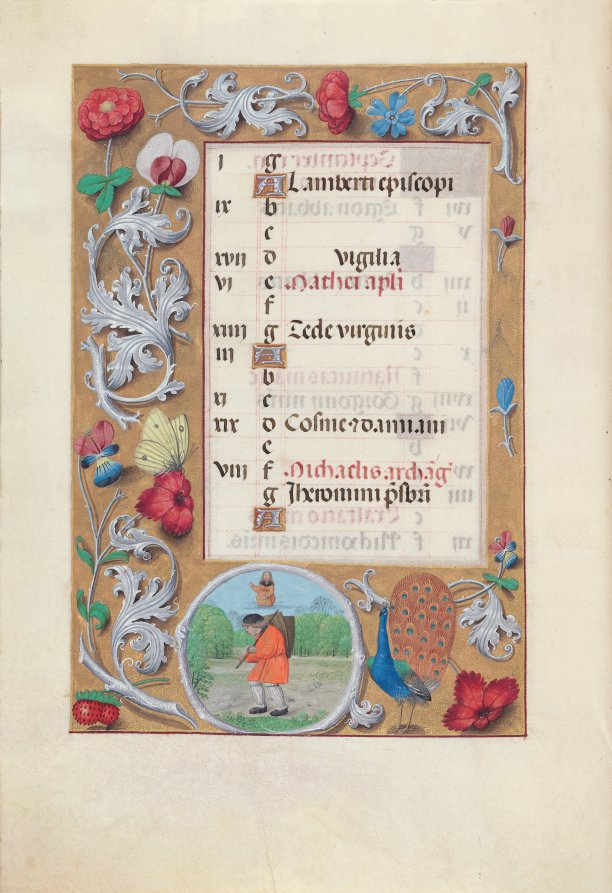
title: Hours of Queen Isabella the Catholic, Queen of Spain: Fol. 10v, September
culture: Flanders, Ghent and Bruges, late 15th century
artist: Master of the First Prayerbook of Maximillian (Flemish, c. 1444–1519)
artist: and Associates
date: c. 1500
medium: ink, tempera, and gold on vellum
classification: Bound Volume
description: This manuscript was illuminated by a circle of at least five highly organized manuscript painters active in the Flemish cities of Ghent and Bruges. The principal illuminator was Alexander Bening, who painted the majority of the book's miniatures. Manuscripts produced by this circle of artists are renowned for the decoration of their borders, which typically feature a rich variety of realistically-painted flowers, birds, and butterflies. This prayer book, called a book of hours, was intended not for a cleric, but for the private devotions of a lay person-in this case, Isabella the Catholic, Queen of Spain (1451-1504). Isabella's coat of arms embellishes the book's frontispiece. It is unlikely that the book was commissioned by the Queen herself; rather, she probably received it as a diplomatic gift from someone courting her patronage, perhaps Cardinal Francisco Jimenez de Cisneros. A Franciscan friar, Jimenez was dependent upon Isabella for his advancement, first to the post of Queen's confessor in 1492, and then to Archbishop of Toledo in 1495.